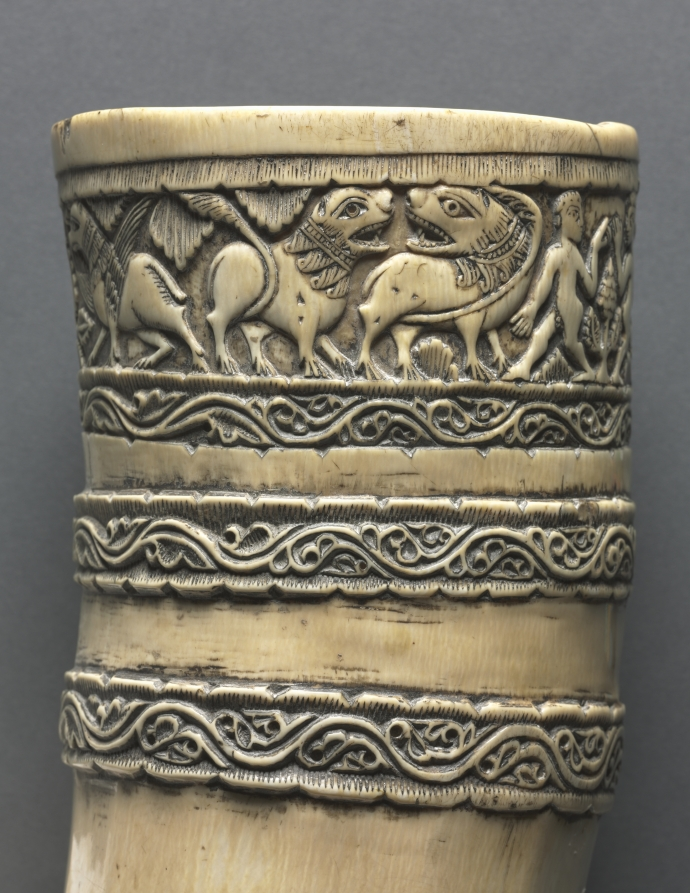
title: The So-called Horn of Saint Blaise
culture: South Italy or Sicily, 12th century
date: 1100–1200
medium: ivory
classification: Ivory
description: This oliphant--a carved elephant tusk in the shape of a hunting horn--was likely carved in an Arab ivory workshop in South Italy or Sicily. It is masterfully shaped, with a series of six carved bands, the outer ring depicting scenes from a hunt. The earliest surviving inventory of the church of Saint Blaise from 1482-85 lists an oliphant decorated with silver rings and precious stones and known as the "Horn of Saint Blaise." By the 17th century, Saint Blaise was reputed to have used this very horn to summon the faithful to worship.